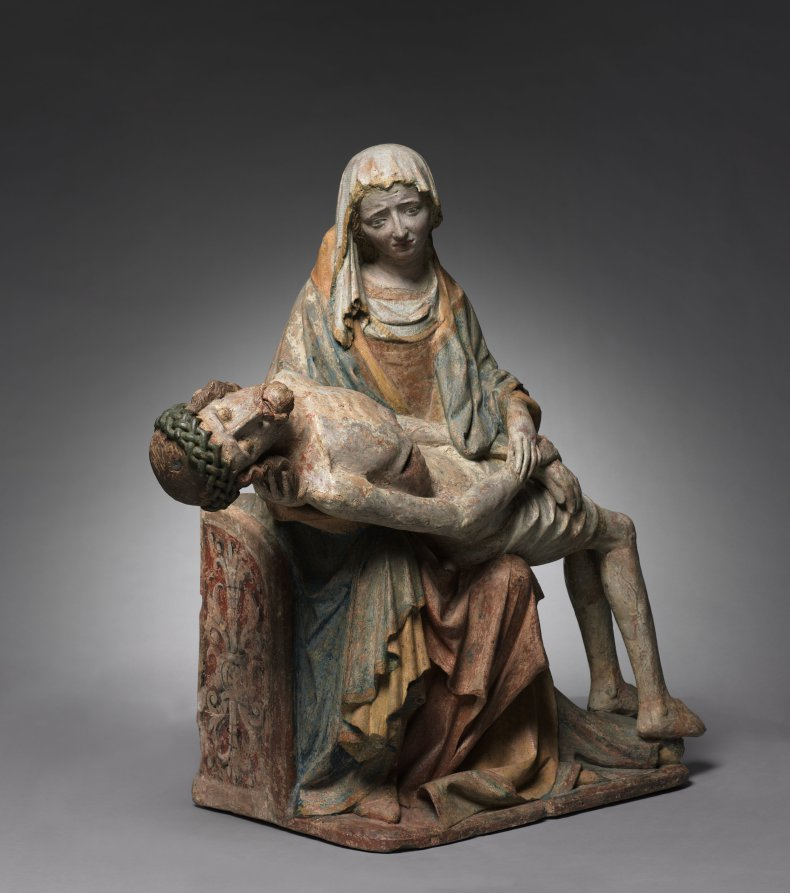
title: Vesperbild (Pietà)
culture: Austria, Steiermark, 15th century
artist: Master of Grosslobming (Austrian)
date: c. 1420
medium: painted cast stone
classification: Sculpture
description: The word vesperbild is the German word for pietà, the image of the Virgin Mary cradling her dead son on her lap. The theme has no literary source; it originated in Germany during the early 1300s and was more widespread in central Europe than in Italy. These devotional sculptures were used within the interior of a church, in small side chapels dedicated to the Virgin. As in this example, they often convey her grief in a sensitive way. For those who prayed before them, vesperbilds were poignant reminders of the Passion of Christ and the suffering of the Virgin.